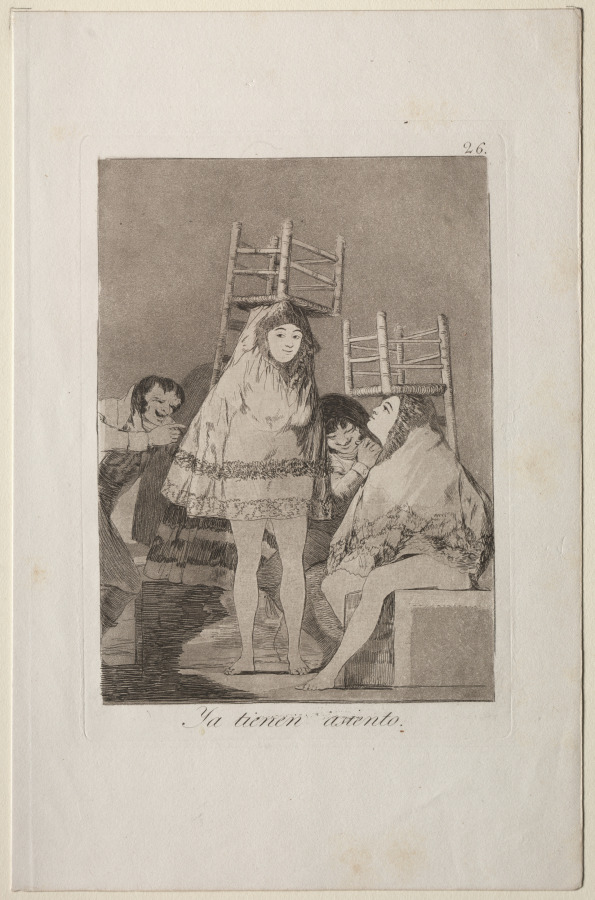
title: They've Already Got a Seat, Plate 26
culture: Spain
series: Los Caprichos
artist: Francisco de Goya (Spanish, 1746–1828)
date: 1799 (printed c. 1855)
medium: etching and aquatint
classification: Print